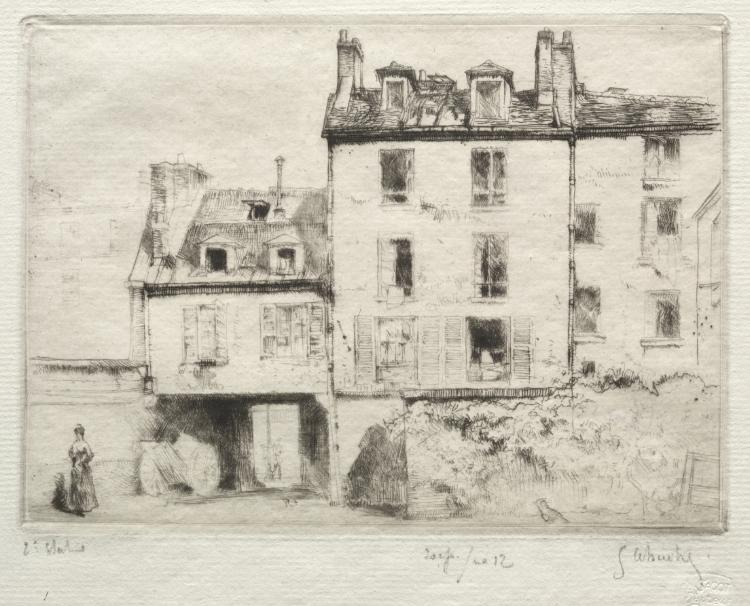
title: La rue Lacépède: le cour de l'Aciereur Cottens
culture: France, 19th-20th century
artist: Gustave Leheutre (French, 1861–1932)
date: c. 1900–1921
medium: etching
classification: Print